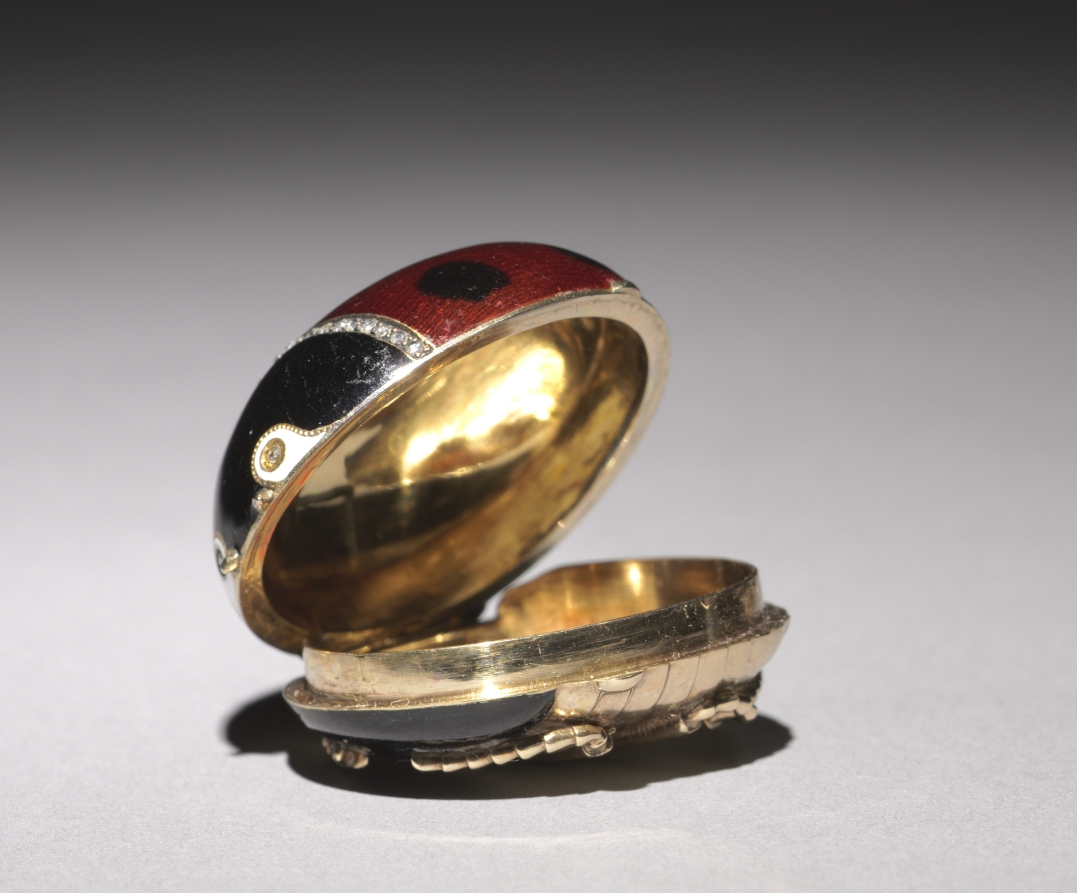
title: Ladybird Beetle Pillbox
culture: Russia, St. Petersburg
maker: House of Fabergé (Russian, 1842–1918)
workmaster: Mikhail Evlampievich Perkhin (Russian, 1860–1903)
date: 1896–1903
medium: gold, enamel, diamonds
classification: Miscellaneous